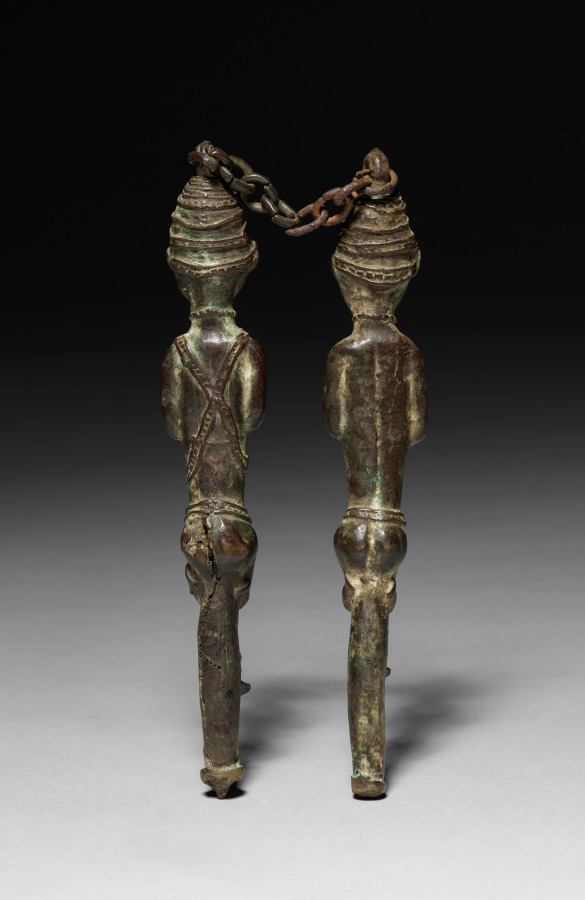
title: Pair of Ritual Staffs (ẹdan Ògbóni)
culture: Africa, West Africa, Nigeria, Yorùbá-style maker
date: 1800s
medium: Copper alloy and iron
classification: Sculpture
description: The chain connecting these two figures allows them to be worn in public by a member of the Ògbóni or Òṣùgbó association as authority emblems. The male on the right gives the association’s typical salute by clasping his left fist on the right one, while the female on the left holds her breasts as a sign of welcome and generosity. The use of copper alloy and iron expresses Ògbóni/Òṣùgbó's concerns with longevity and durability. Long iron spikes would have originally protruded from each figure's base.